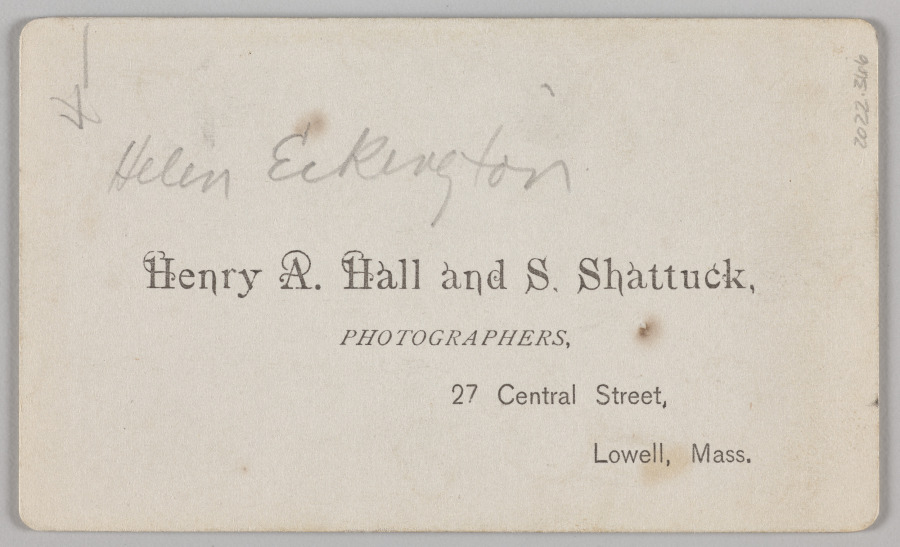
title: Untitled (white woman in Japanese kimono with fan)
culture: Unknown, 19th century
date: 1890s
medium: gelatin silver print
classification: Photograph